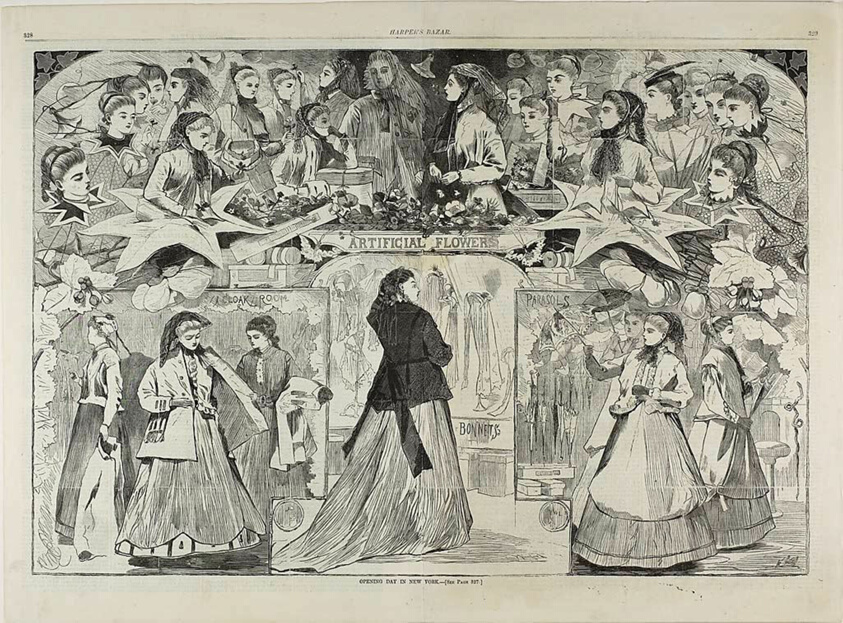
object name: Print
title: Opening Day in New York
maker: Winslow Homer (American, 1836-1910); published by Harper's Bazar (American, founded 1867)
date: published March 21, 1868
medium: Wood engraving on paper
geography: United States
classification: wood engraving; print; prints and drawing